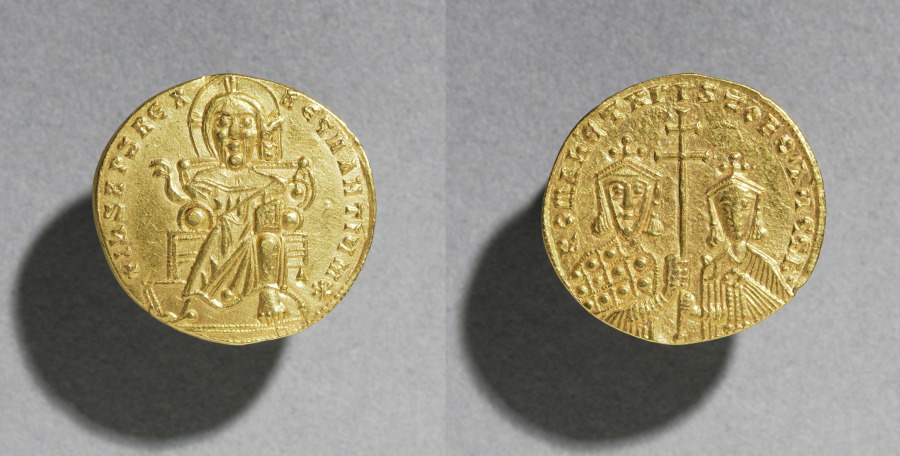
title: Solidus with Romanus I Lecapenus and His Son Christopher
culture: Byzantium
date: 920–944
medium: gold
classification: Coins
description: Byzantine Gold Coins The vast number of surviving Byzantine coins attests to the level of trade across the empire. Controlled and supervised by the emperor, the producers of coins took care to represent his authority and reflect his stature. Talented artists were recruited to engrave the dies (molds) used for the striking of coins. Emperors increasingly came to include their heirs and co-emperors on their coinage, as well as other family members or even earlier rulers. Coins were recognized, then as now, as small, portable works of art. With their inscriptions and images, Byzantine coins provide valuable documentation of historical events and a record of the physical appearance of the emperors. The coins shown here include the solidus, the basic gold coin of 24 karats; the tremissis, a gold coin of one-third the weight and value of the solidus; and the nomisma, which in the 10th century replaced the solidus as the standard gold coin.